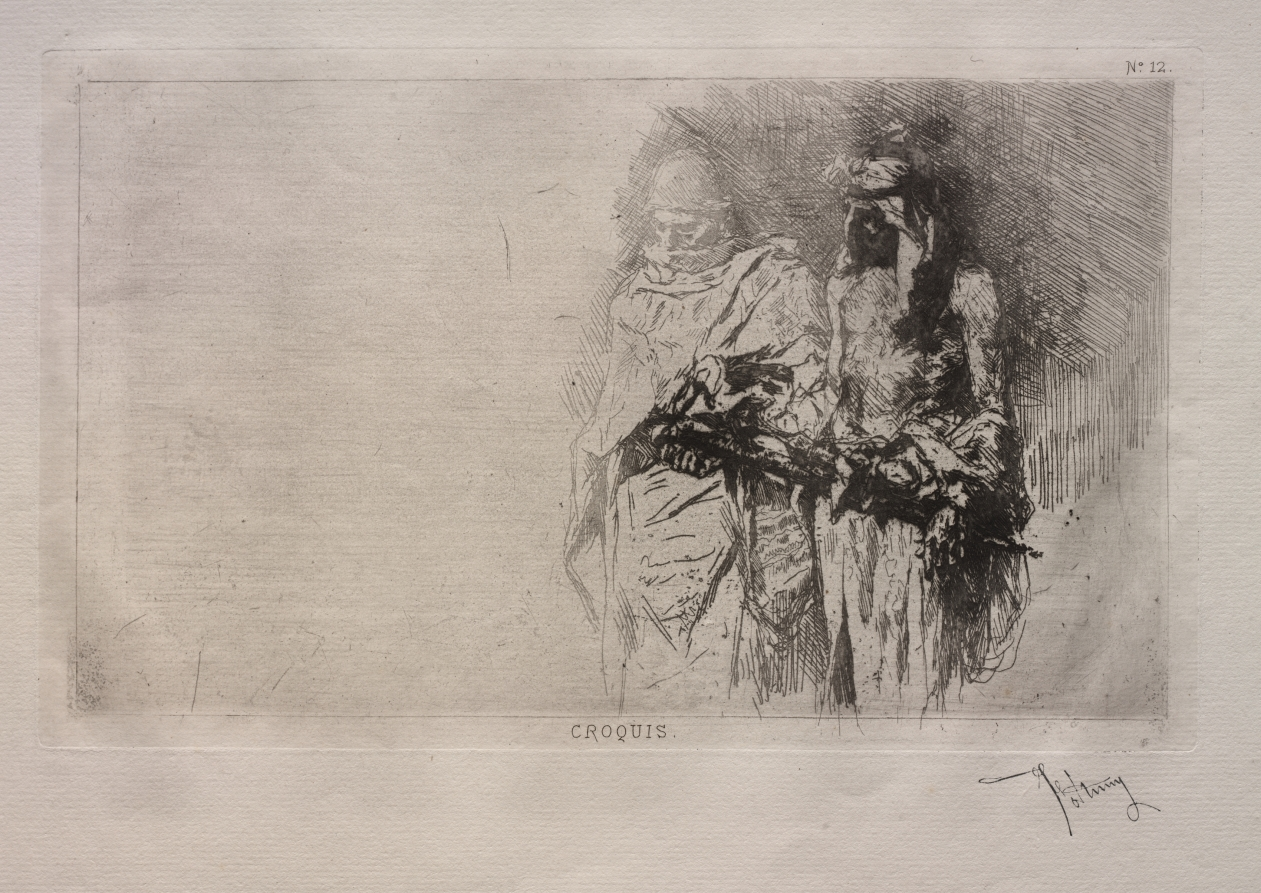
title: Sketch (Two Arabian Figures)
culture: Spain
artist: Mariano Fortuny (Spanish, 1838–1874)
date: c. 1865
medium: etching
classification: Print